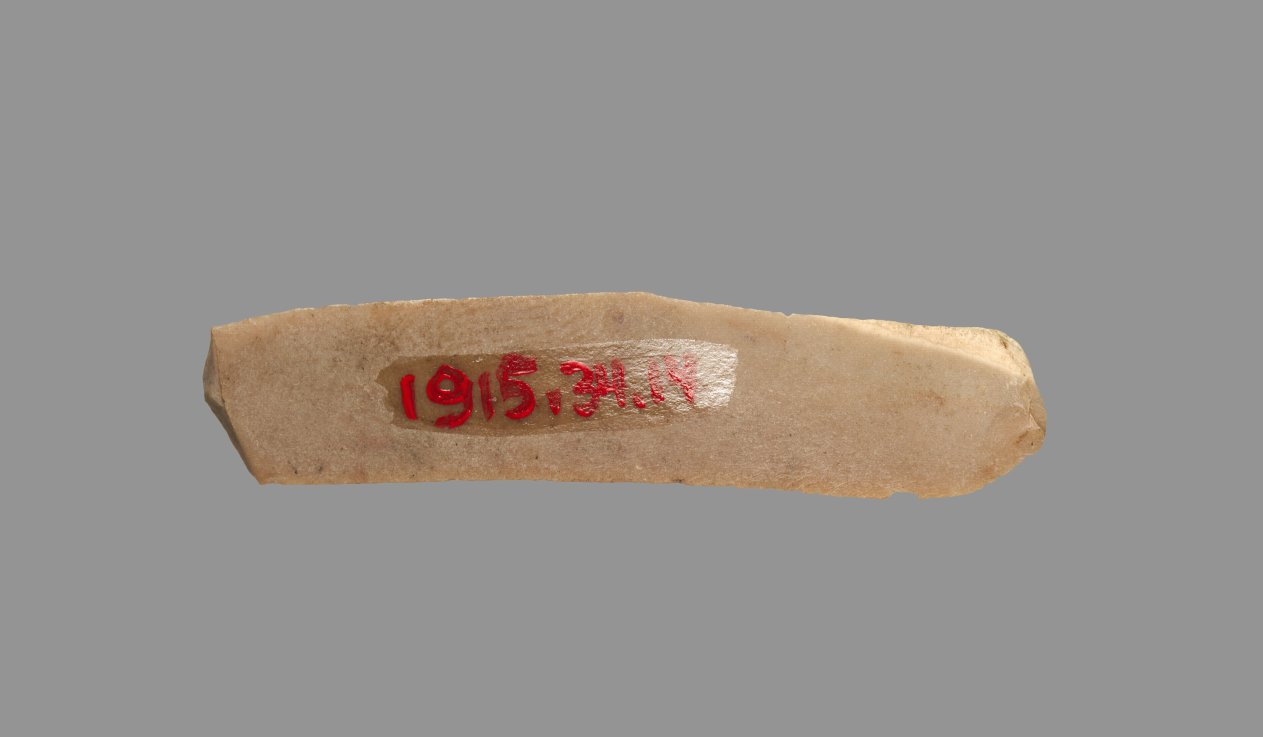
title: Sickle Blade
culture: Egypt, Middle Kingdom (2040–1648 BCE), Dynasty 12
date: 1980–1801 BCE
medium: flint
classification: Implements